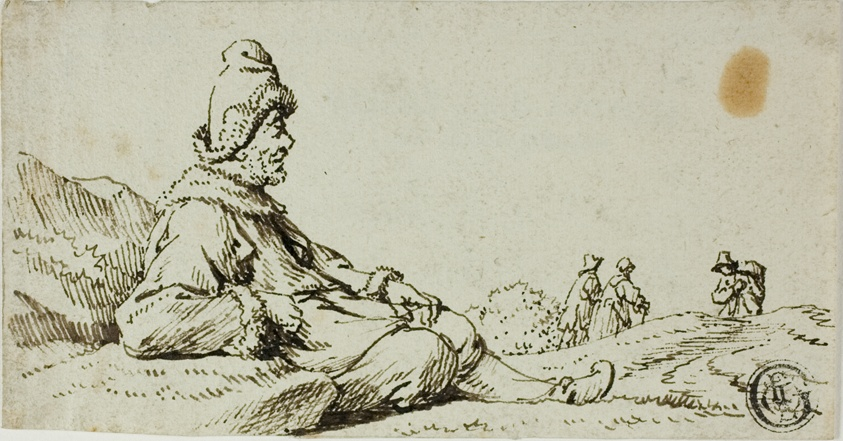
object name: Drawing and Watercolor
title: Man Resting in Landscape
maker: Possibly David Teniers the Younger; Flemish, 1610-1690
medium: Pen and brown ink, on ivory wove paper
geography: Flanders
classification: pen and ink drawings; drawings (visual works); prints and drawing